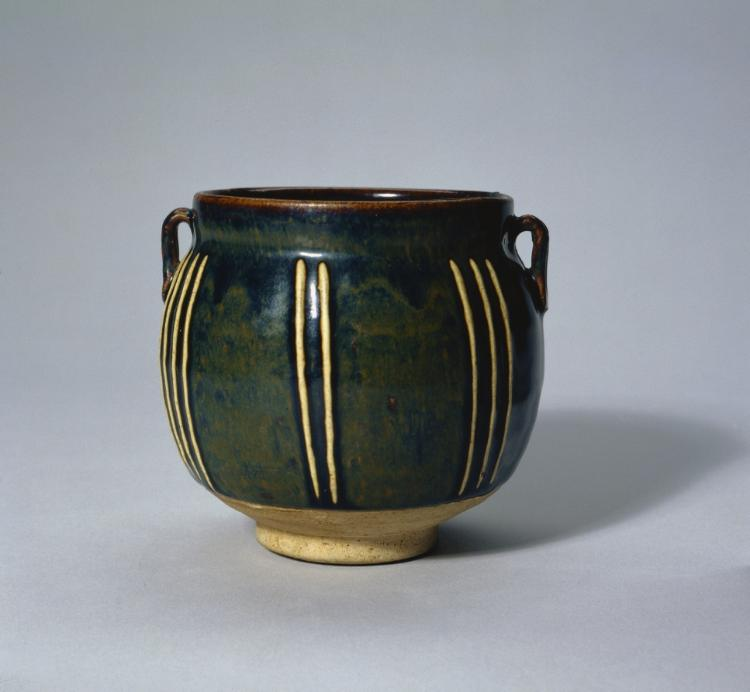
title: Jar with Handles: Cizhou ware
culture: China, Henan or Hebei province, Jin dynasty (1115-1234)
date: 1100s-1200s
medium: glazed buff stoneware with underglaze iron slip coating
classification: Ceramic